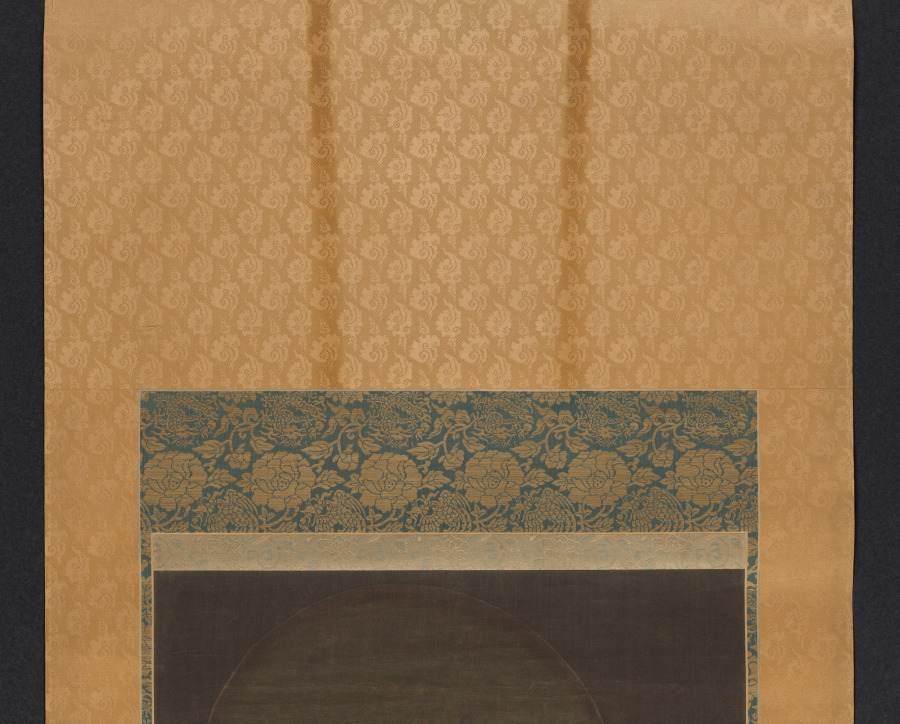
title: Samantabhadra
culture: China, Southern Song dynasty (1127-1279)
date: 1100s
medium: hanging scroll; ink and color on silk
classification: Painting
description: In the last chapter of the Lotus Sutra, one of the principal Buddhist texts, the great Bodhisattva Samantabhadra is described advancing to earth, riding on a six-tusked elephant, and proclaiming himself protector of the faithful. More frequently, he is shown with Bodhisattva Manjusri as the attendants of Shakyamuni (the historical Buddha). This scroll is probably the left panel in a triptych (group of three paintings) portraying these deities.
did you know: Samantabhadra holds a lotus with a sutra on top of the blossom.